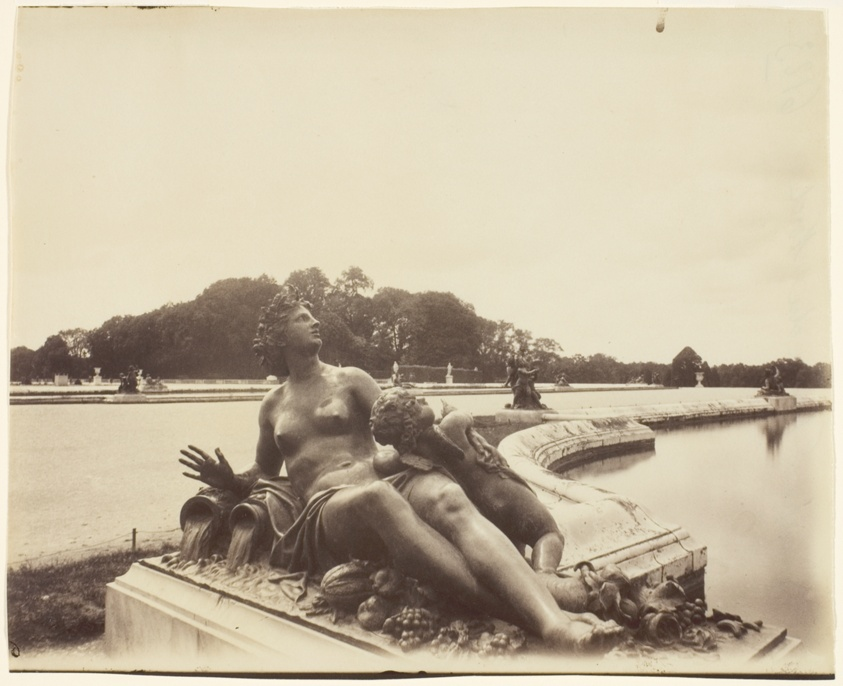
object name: Photograph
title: Versailles, Bassin du Nord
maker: Jean-Eugène-Auguste Atget (French, 1857–1927)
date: 1901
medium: Albumen print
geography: France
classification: albumen silver print; photographic process; photography; photograph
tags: Collected by Hugh Edwards